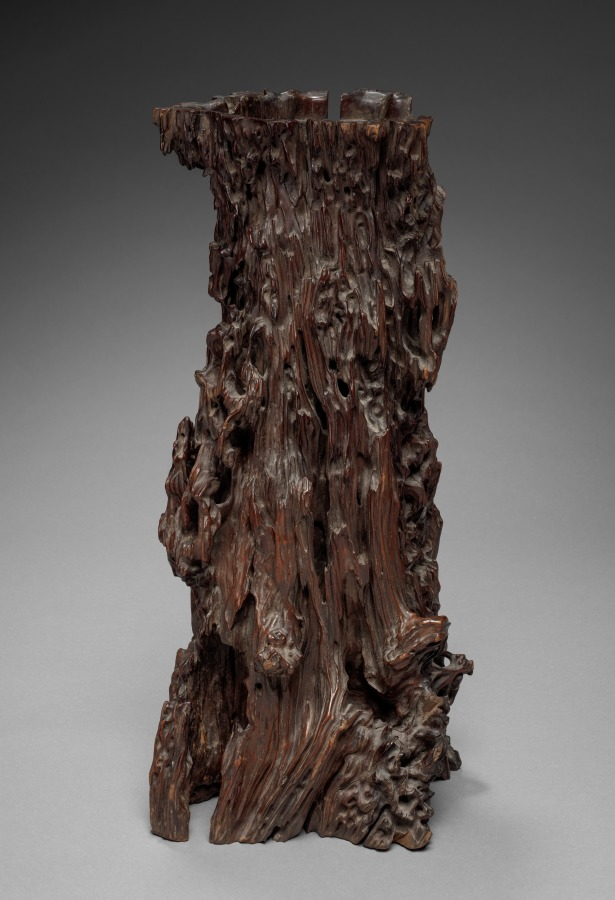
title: Prunus Wood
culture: China, Qing dynasty (1644-1911)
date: 1700–1899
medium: wood carving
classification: Wood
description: The gnarled and twisted form of a prunus stump is carved to accentuate its naturally textured surface. The body is finely polished to create a lustrous patina. Simple wood carvings like this exemplify the Chinese scholars’ taste for natural forms and rustic materials, which in turn reflect the desire to retreat into nature. They were collected and displayed as decorative works of art in the traditional scholars’ studios.